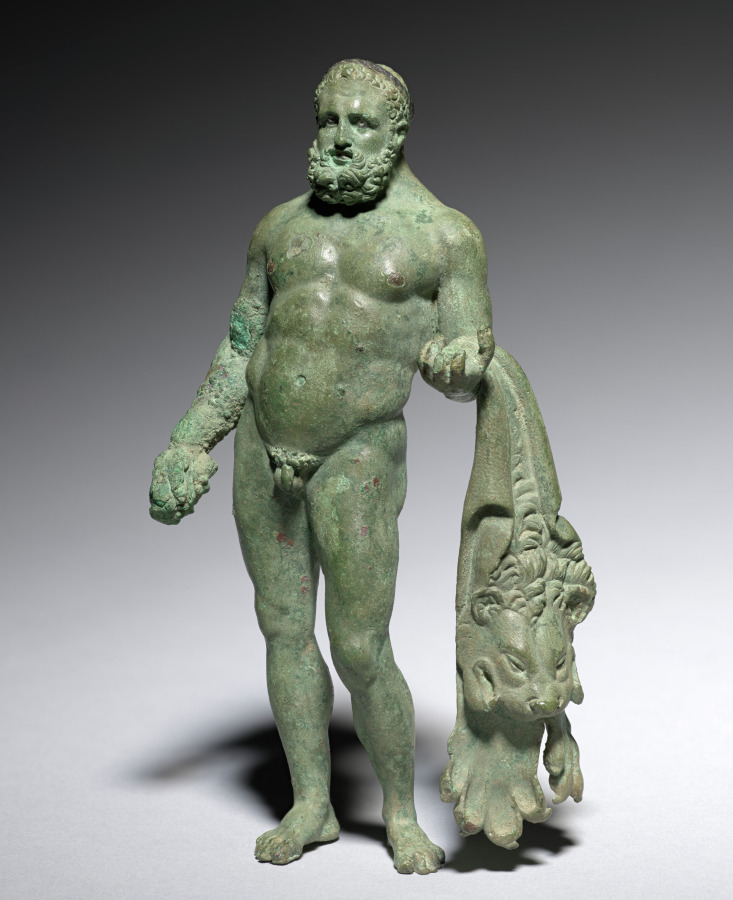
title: Hercules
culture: Italy, Rome, Early Imperial period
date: c. 30 BCE–20 CE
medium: bronze with silver and copper inlays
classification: Sculpture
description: This bronze statuette is a nude figure of the hero Hercules. He stands in a contrapposto pose, with the majority of his weight on one leg. Over his left arm, Hercules holds the skin of the Nemean Lion, having slayed the beast as part of his Twelve Labors and now carrying the pelt as a trophy. Although now mostly lost, Hercules once held his signature wooden club in his right hand. Roman artists often portrayed Hercules as middle-aged, as though greater maturity would increase his power and virility.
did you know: Hercules is the Roman name for the classical hero known in Greek as Herakles.